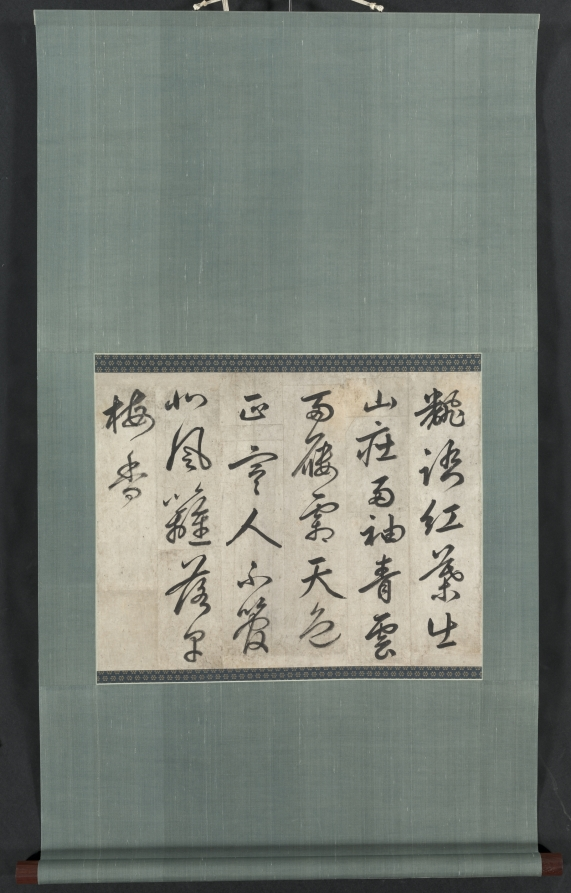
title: Poem on Plum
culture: Korea, Joseon dynasty (1392–1910)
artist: copy after Yi Hwang (Korean, 1501–1570)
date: 1700s–1800s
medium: hanging scroll; ink on paper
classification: Calligraphy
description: For Yi Hwang, a celebrated scholar and poet in 16th-century Korea, writing poems was an escape from partisan politics. Because its flowers often bloom in the middle of winter, Joseon period Korean scholars like Yi found plum blossoms a perfect subject to express the value of endurance and self-cultivation. In his numerous poems, Yi used plum blossom imagery to express his feelings. The poem on this hanging scroll reads: “Wishing to fly away, red leaves left the mountain villa. Their large sleeves are frosted due to blue clouds. The clouds in the sky look upright, which are beyond human beings’ ability. The plum tree whispered to me that [the leaves] fell from the wind and landed on the fence.” The mountain villa in this poem may refer to the Dosan Academy, a Confucian school that Yi established after his retirement, and the red leaves of the plum blossom are probably Yi’s poetic personification.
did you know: Yi Hwang, the author of this calligraphy, composed more than 100 poems on plum blossoms.